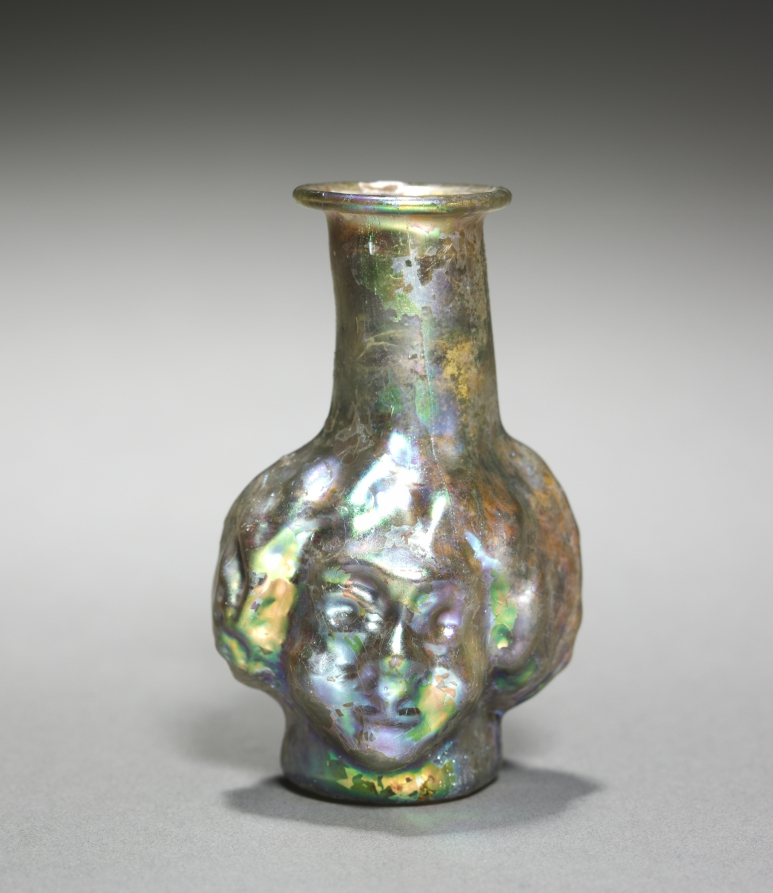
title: Janiform Head Flask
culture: Roman, probably Eastern Mediterranean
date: 100–400 CE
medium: glass, mold-blown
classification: Glass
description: Called Janiform after Janus, the two-faced Roman god associated with doorways and beginnings, two-faced head flasks like this were popular across the Roman Empire. The faces themselves, quite similar to one another, could both represent Janus, although he is typically bearded and here the gender is unclear. Some other two-faced head flasks clearly differentiate between the two sides, showing one serious, the other smiling.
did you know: The iridescence covering much of the surface obscures the original violet-like color.